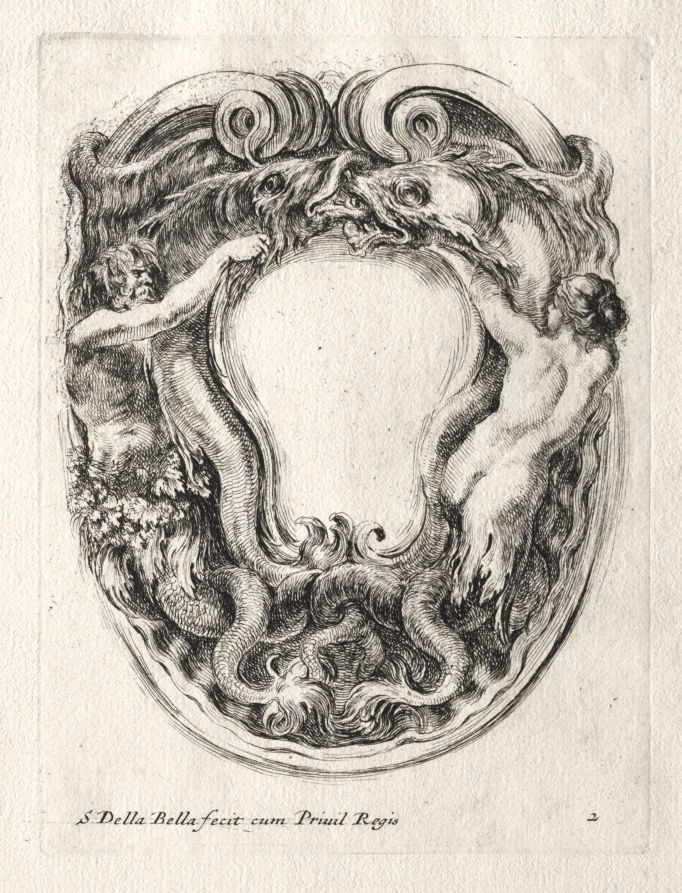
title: New Model for a Cartouche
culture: Italy, 17th century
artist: Stefano Della Bella (Italian, 1610–1664)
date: 1647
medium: etching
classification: Print